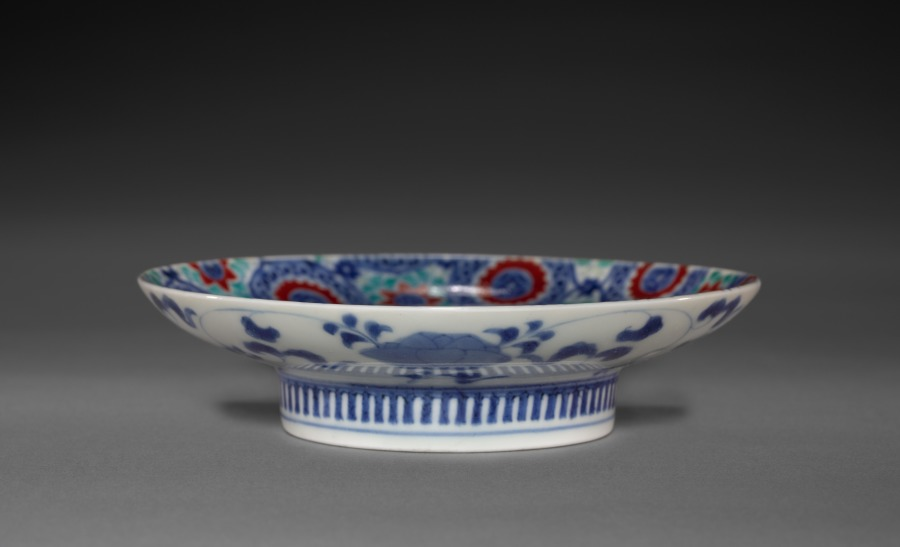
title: Dish with Brocade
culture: Japan, Edo period (1615–1868)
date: late 1600s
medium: Porcelain with underglaze blue and overglaze enamel (Hizen ware, Nabeshima type)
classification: Ceramic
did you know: Designs on Nabeshima ware, like this dish, were often inspired by Japanese textiles.